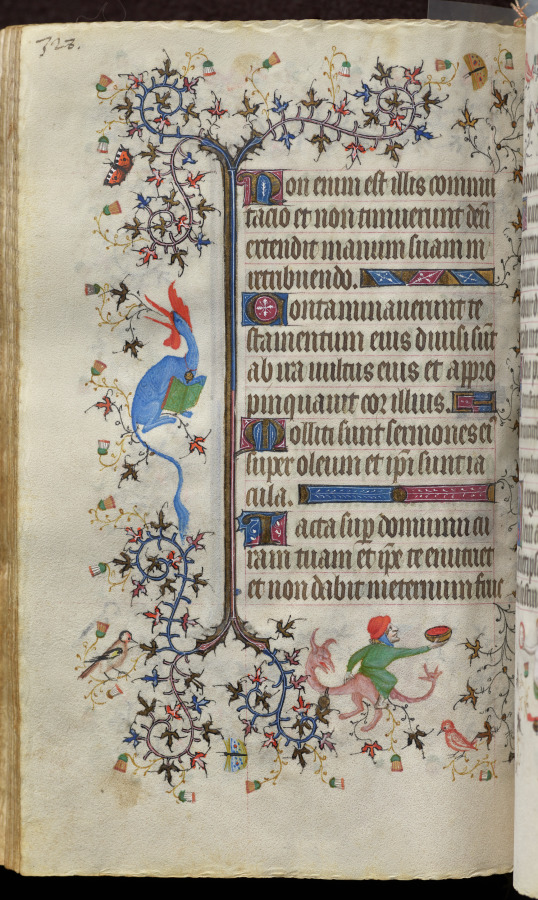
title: Hours of Charles the Noble, King of Navarre (1361-1425): fol. 164v, Text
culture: France, Paris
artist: Master of the Brussels Initials and Associates (French)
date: c. 1405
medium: ink, tempera, and gold on vellum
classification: Bound Volume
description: This precious volume was obviously highly prized by its owner, the French-born King of Navarre, who had his coat of arms painted on no less than twenty folios. Rather than directly commissioning this manuscript from a specific workshop, it seems that Charles the Noble acquired his book of hours -- perhaps ready-made for the luxury market -- while on a trip to Paris in 1404-05. A collaborative effort, six painting styles are evidenced within the pages of this codex, those of two Italians, two Frenchmen, and two Netherlanders. The painter who was responsible for the planning and decoration of the book, and who produced seventeen of the large miniatures, was a Bolognese artist known as the Master of the Brussels Initials. His principal assistant, responsible for most of the borders, was a Florentine who signed his name "Zecho" da Firenze on folio 208 verso.